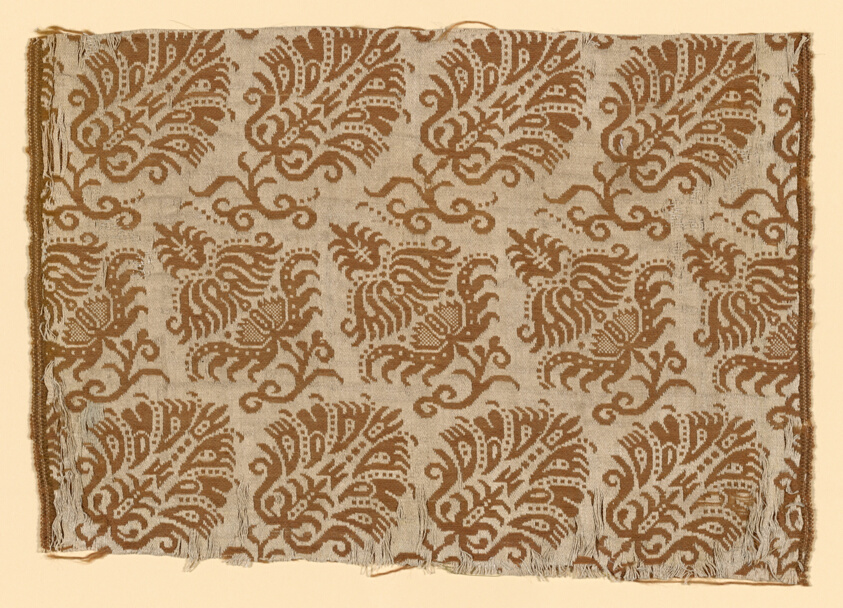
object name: Textile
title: Fragment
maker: Italy or Spain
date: 1625/75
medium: Linen and wool, plain weave; tied and free double cloth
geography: Italy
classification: textile; weaving